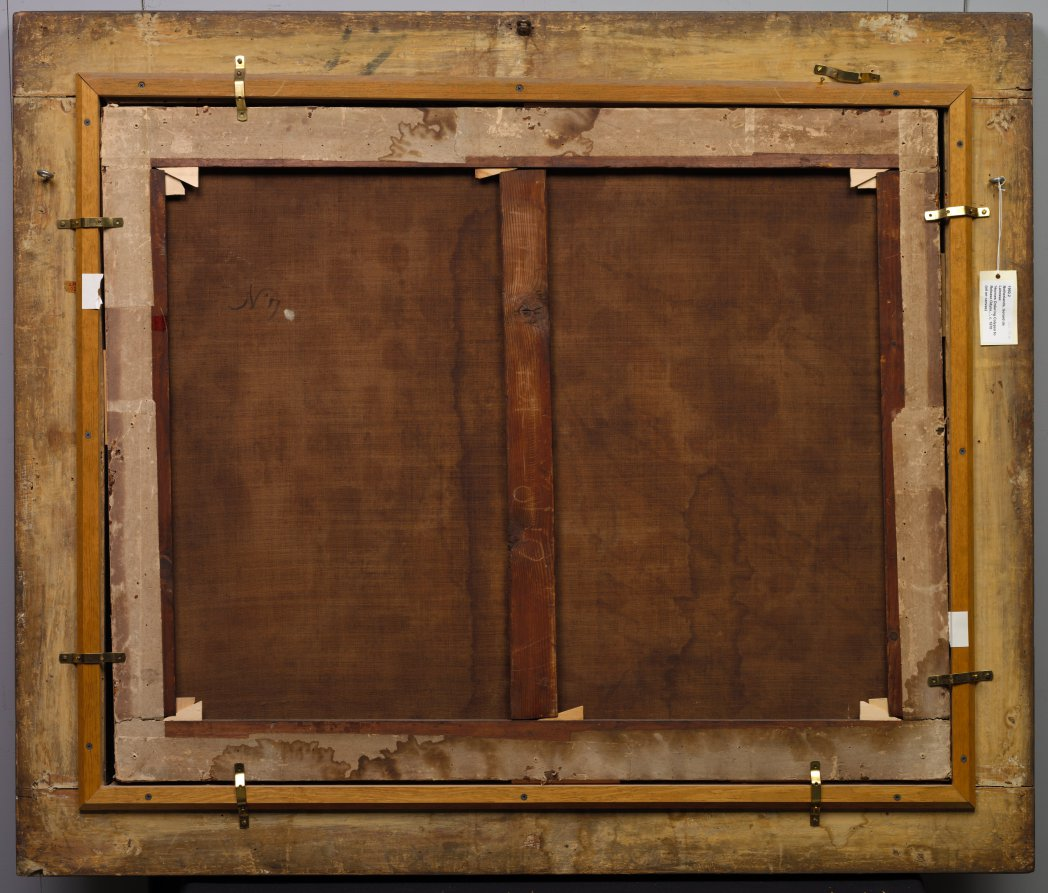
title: Hermes Ordering Calypso to Release Odysseus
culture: Netherlands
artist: Gerard de Lairesse (Flemish, 1641–1711)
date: c. 1670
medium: oil on canvas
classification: Painting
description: The Greek goddess Calypso held the hero Odysseus captive for seven years, preventing his return home from the Trojan War. Despite Calypso’s charms and the luxurious surroundings, Odysseus longed for his home and family, so the Olympian gods finally allowed his freedom. Here, the god Hermes swoops down to free Odysseus from Calypso’s embrace. De Lairesse, popularly known as the “Dutch Poussin,” introduced to the Netherlands a classicizing style influenced by artists of the French Academy.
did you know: Calypso, reclining on her bed, looks at us with the same charming smile she used on Odysseus.